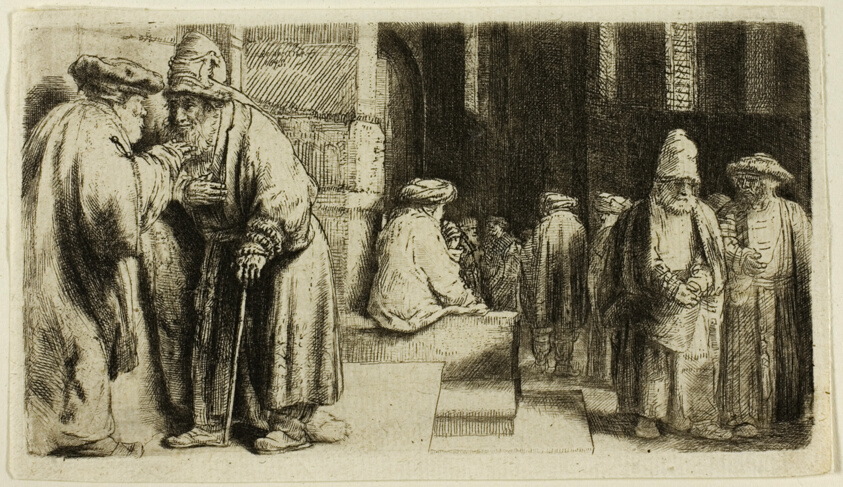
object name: Print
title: Jews in the Synagogue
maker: Rembrandt van Rijn (Dutch, 1606-1669)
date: 1648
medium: Etching and drypoint on ivory laid paper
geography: Holland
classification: etching; print; prints and drawing; paper; drypoint